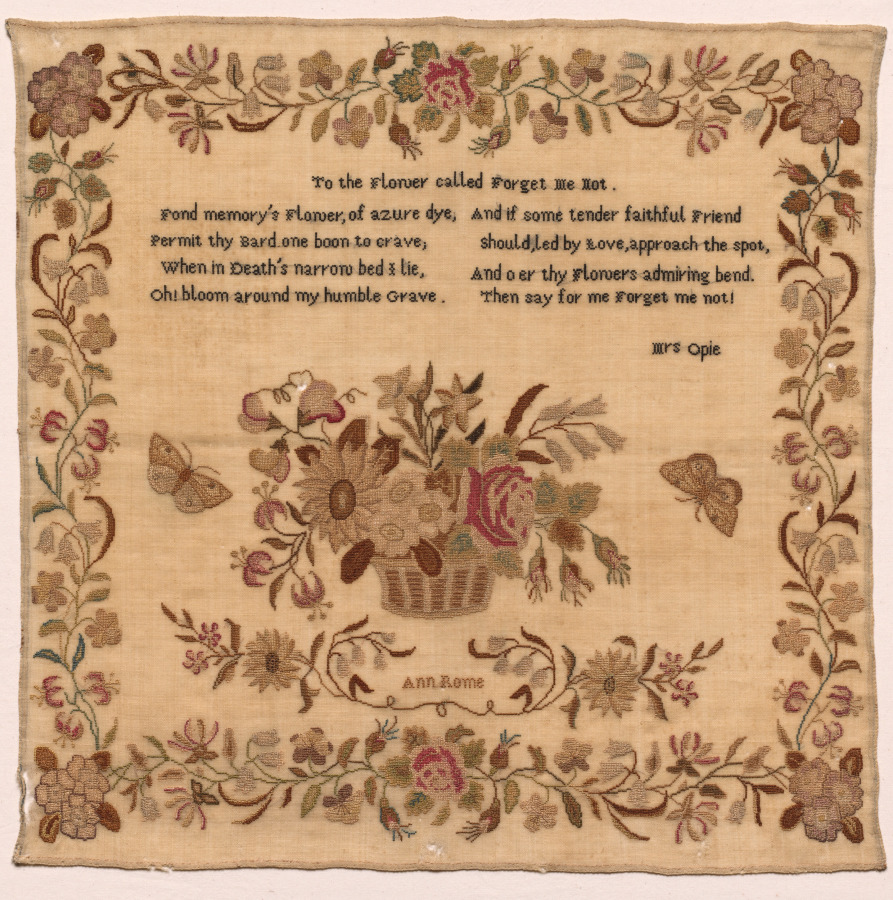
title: Sampler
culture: England, 19th century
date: 1800s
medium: embroidery; silk on woolen canvas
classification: Sampler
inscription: above, left-hand stanza: "To the Flower called Forget Me Not./ Fond memory's Flower, of azure dye,/ Permit thy Bard one boon to crave,/ when in Death's narrow bed I lie,/ Oh! bloom around My humble Grave."; right-hand stanza: "And if some tender faithful Friend/ should, led by Love, approach the spot,/ And o er thy Flowers admiring bend./ Then say for me Forget me not!/ Mrs. Opie"; below basket of flowers: "Ann Rome."